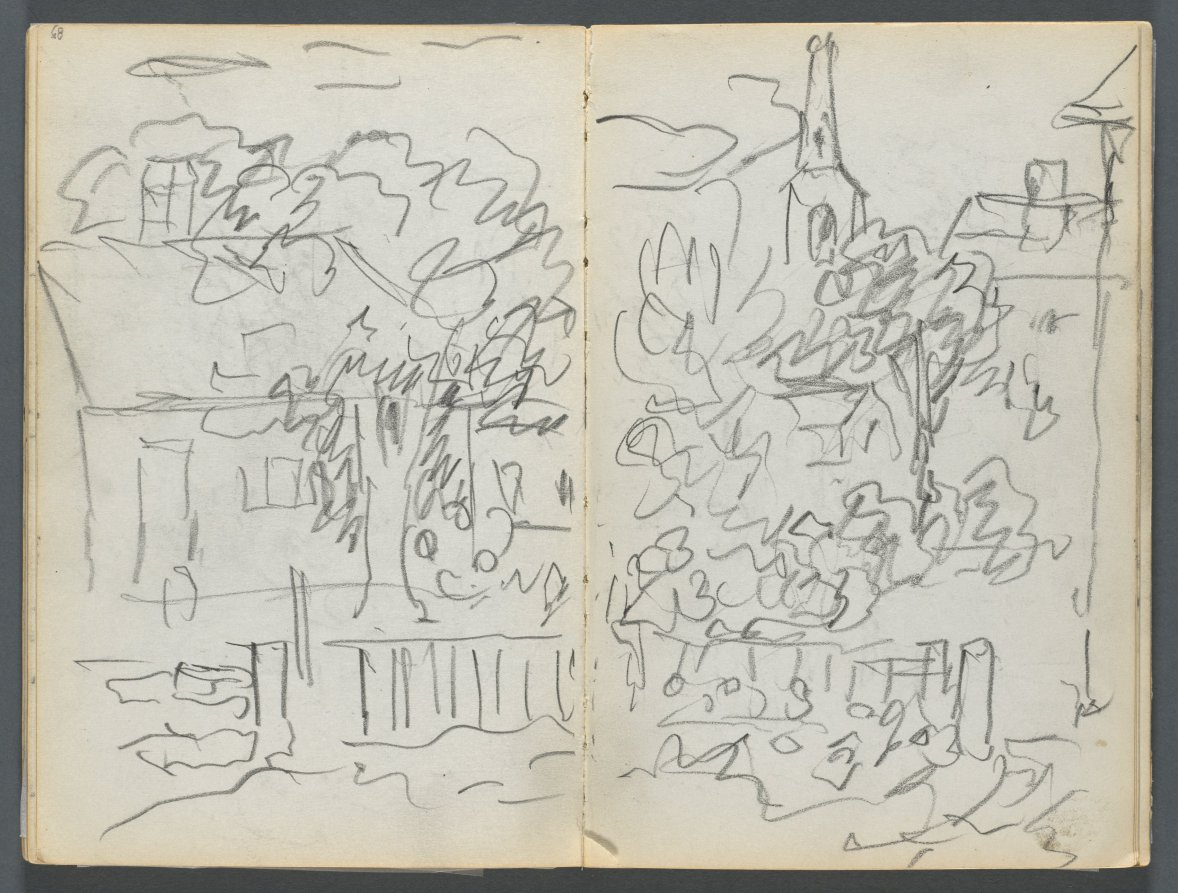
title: Sketchbook, The Dells, N° 127, page 084 & 85: Landscape with Houses and Spire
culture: America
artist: Maurice Prendergast (American, born Newfoundland [now Canada], 1858–1924)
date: c. 1919–1921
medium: graphite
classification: Bound Volume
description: This sketchbook contains 59 pages of graphite drawings and 16 watercolors made at various locations on Cape Ann, Massachusetts.